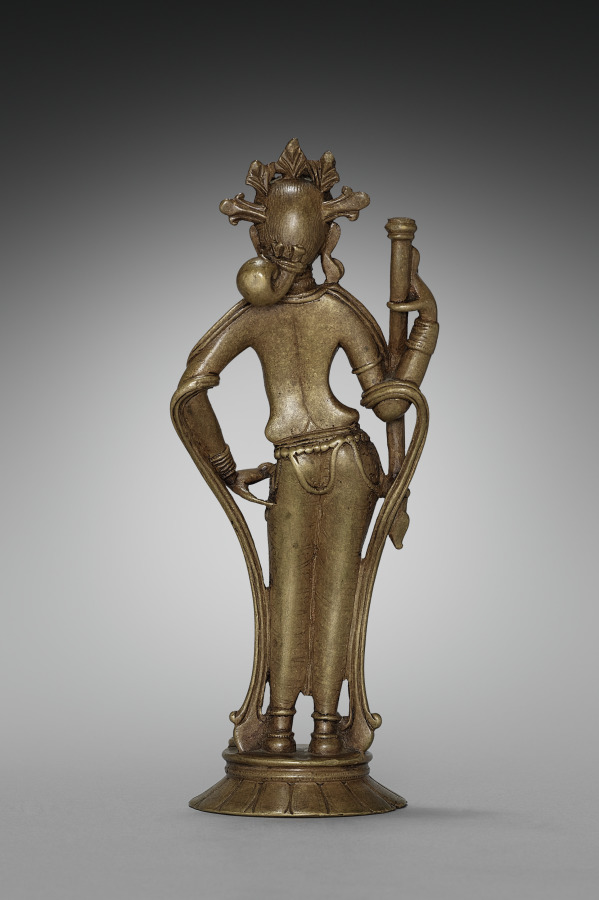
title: Standing Devi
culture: India, Ladakh, 12th century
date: 1100s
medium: brass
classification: Sculpture